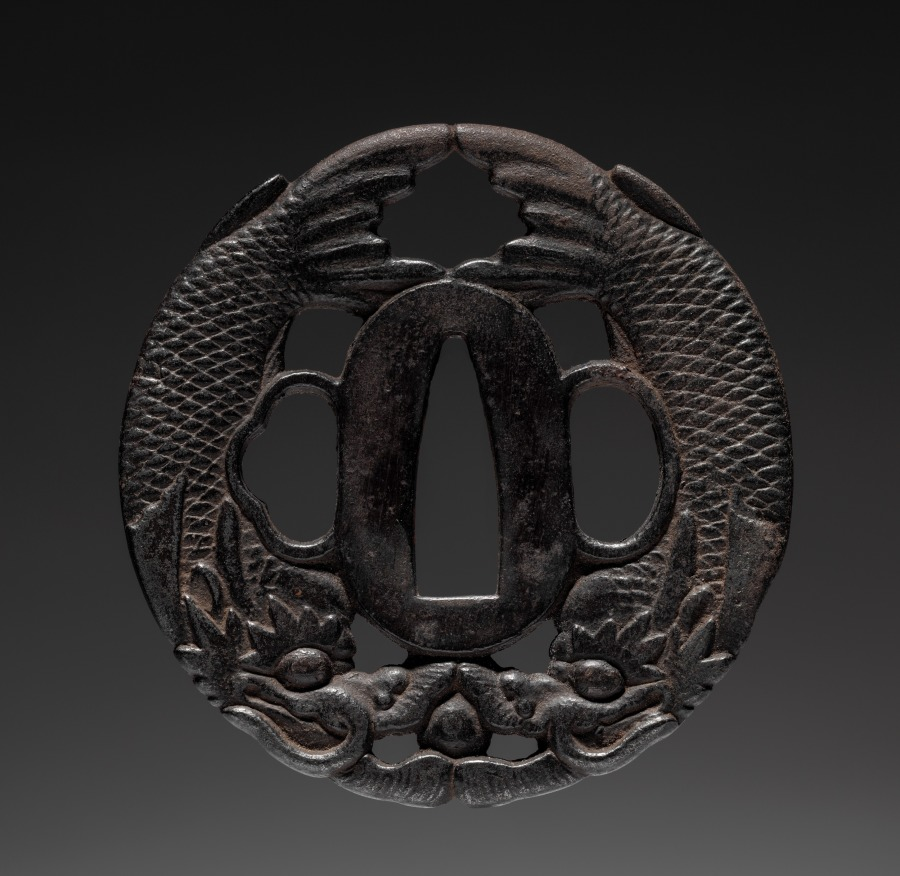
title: Sword Guard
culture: Japan, Edo period (1615–1868)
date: mid-1800s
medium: iron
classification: Arms and Armor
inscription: Signature: Mitsunori made